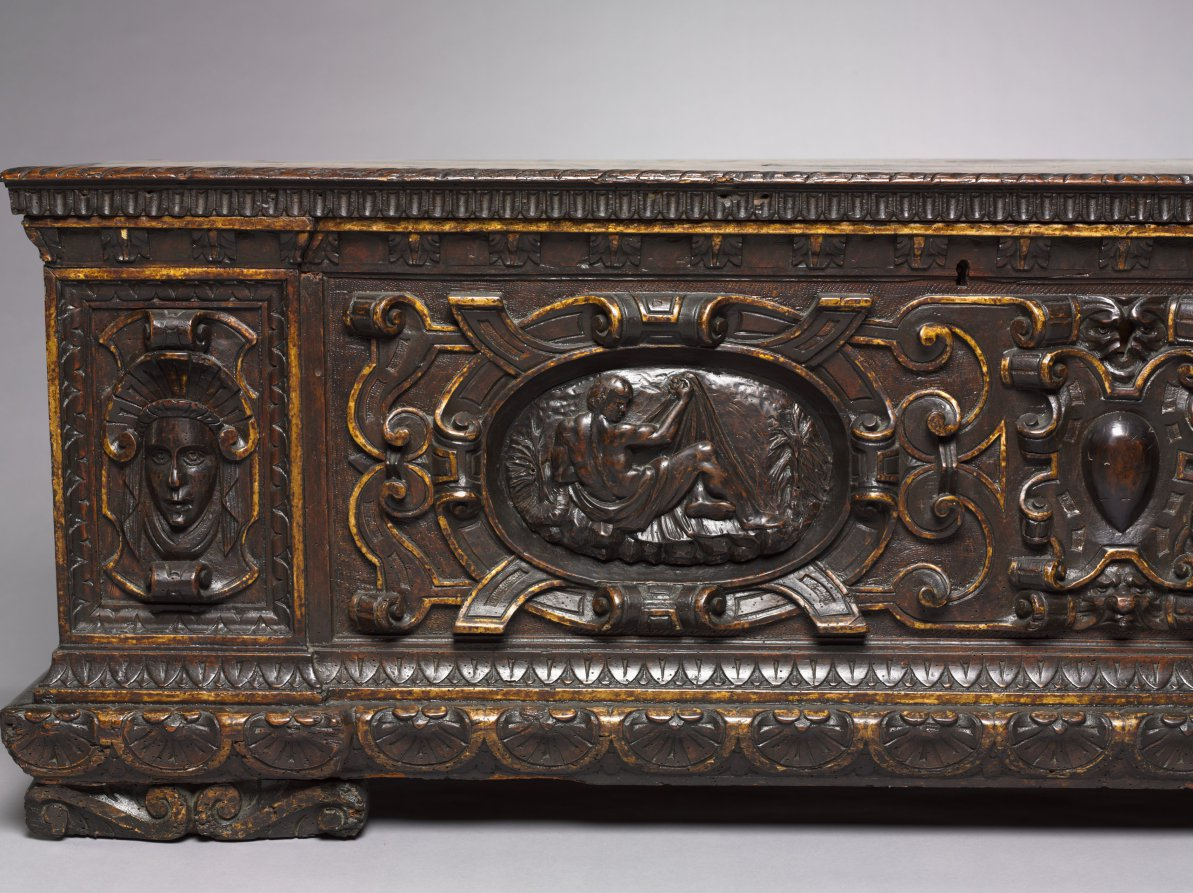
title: Cassone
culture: Italy, Venice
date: mid-1500s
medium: walnut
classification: Furniture and woodwork